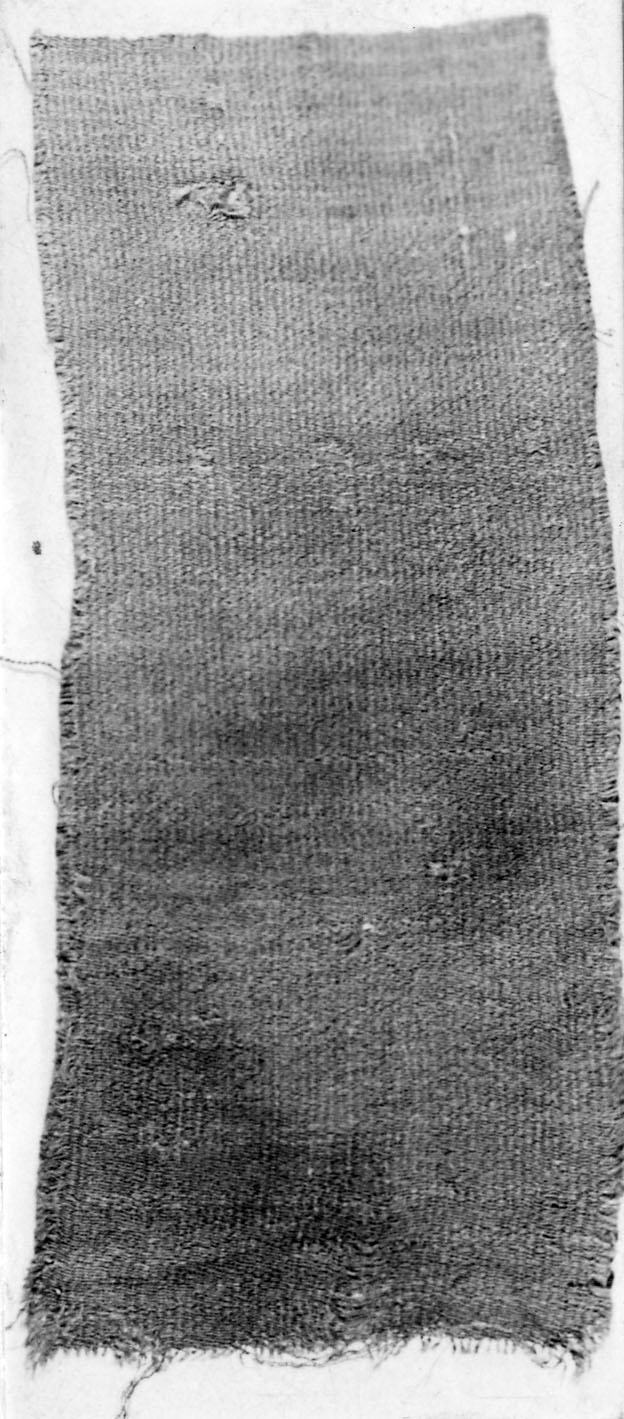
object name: Textile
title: Fragment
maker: Peru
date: 1–1532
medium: Plain cloth. (old card)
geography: Peru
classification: textile; weaving